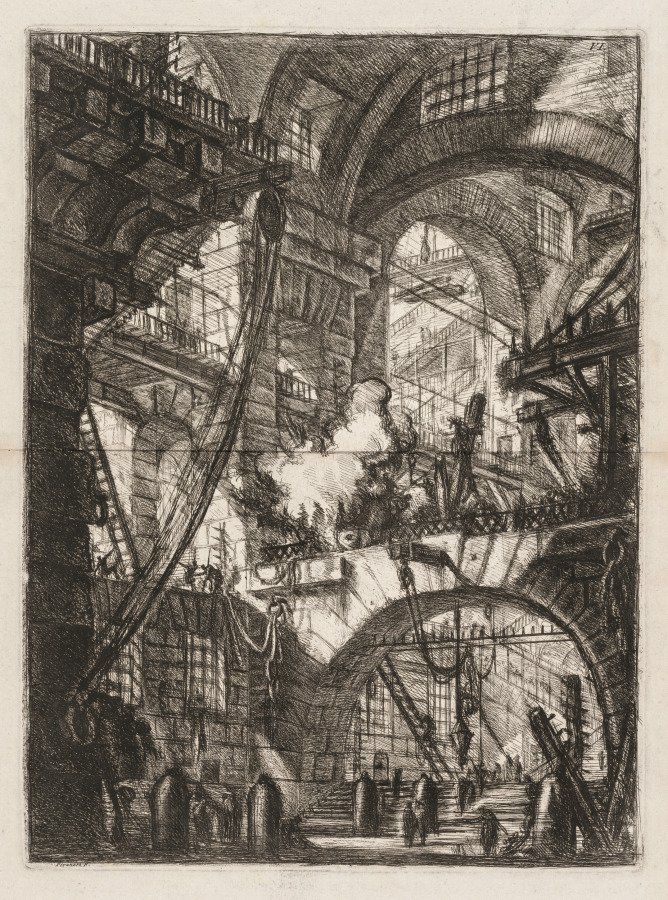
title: The Prisons: A Perspective of Arches with a Smoking Fire in the Center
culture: Italy, 18th century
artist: Giovanni Battista Piranesi (Italian, 1720–1778)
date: 1749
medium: etching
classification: Print